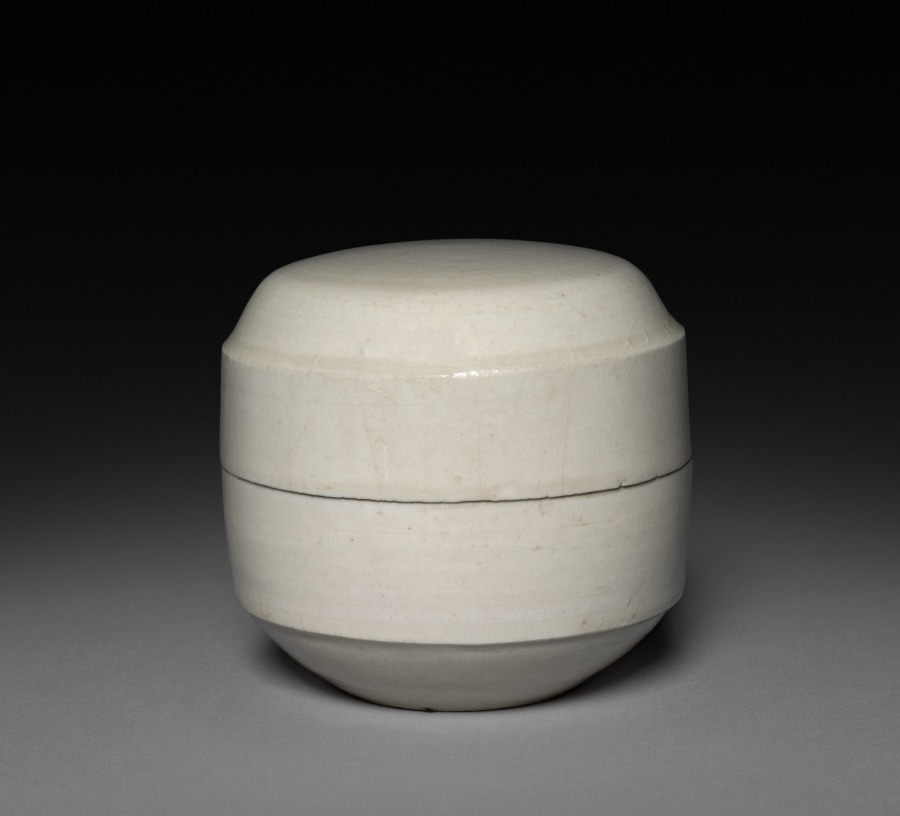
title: Covered Box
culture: China, Hebei province, Quyang, Northern Song dynasty (960–1127)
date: 1000s–1100s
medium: white porcelain, Ding ware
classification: Ceramic